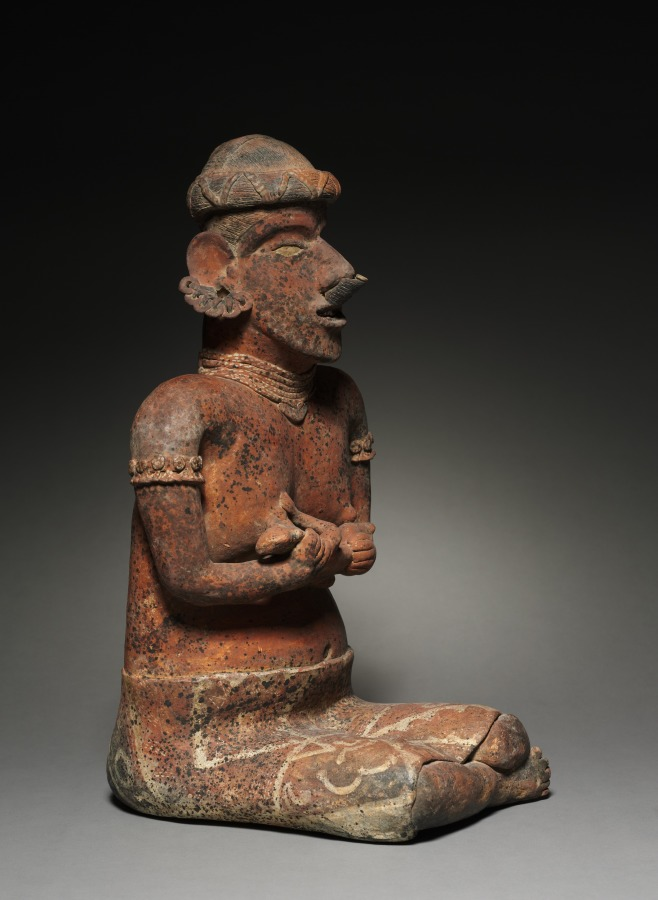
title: Female Seated Figure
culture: Mexico, Nayarit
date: 100 BCE–300 CE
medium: ceramic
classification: Ceramic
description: This couple-extremely fine examples of their kind-may commemorate the marriage of an important person, such as a chief, but could also represent siblings of a chiefly family. Whatever their relationship, their unity is conveyed by their physical similarities, including their jewelry, which marks high social station. The female is unusual in nursing an infant, likely a reference to generational renewal and the continuation of noble bloodlines. The significance of the male’s activity-beating a turtle-shell drum- is not understood.